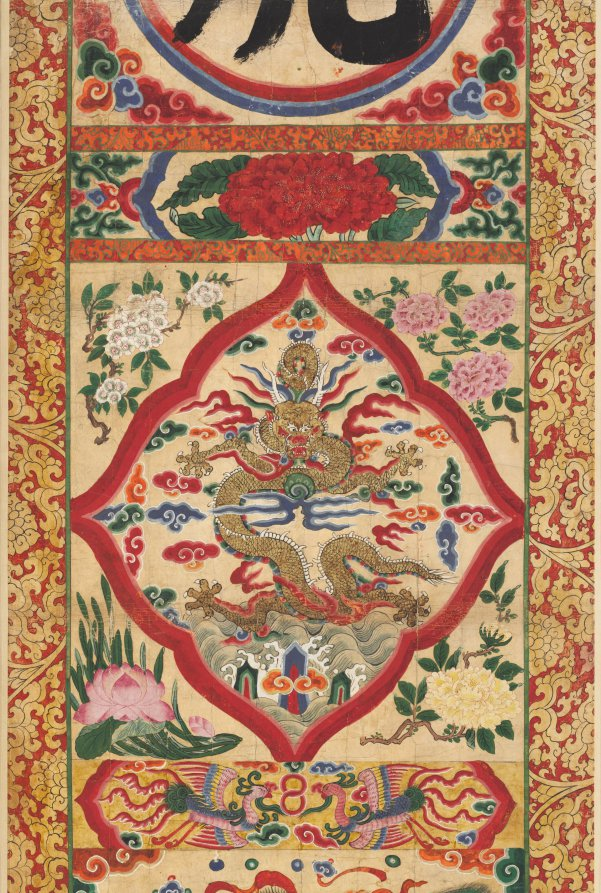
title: Painted Panel of Character "Tiger"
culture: Korea, Joseon dynasty (1392–1910)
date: early 1900s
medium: hanging scroll, ink and color on paper; unmounted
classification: Painting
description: This set of four colorful hanging scrolls may have been used in an outdoor Buddhist ritual to evoke heavenly blessings. Each hanging scroll bears four different character; tiger, dragon, whistle, and recite. Traditionally, tiger and dragon belong to the four directional guards, respectively west and east.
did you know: This set of four colorful hanging scrolls may have been used in an outdoor Buddhist ritual to evoke heavenly blessings.